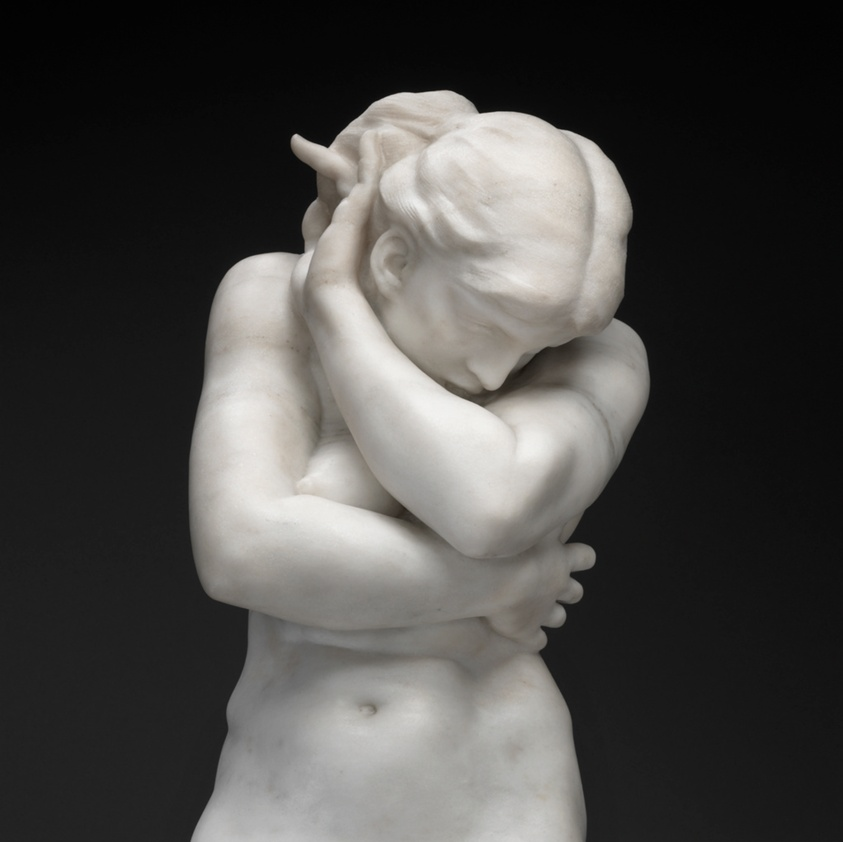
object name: Sculpture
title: Eve after the Fall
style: nineteenth century, 19th century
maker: Auguste Rodin (French, 1840–1917)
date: Modeled 1883, carved c. 1886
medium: Marble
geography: France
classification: statuette; sculpture; figure; french; marble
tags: Eve (Biblical), nudes, woman, genesis, religious figures, figure, biblical, religion